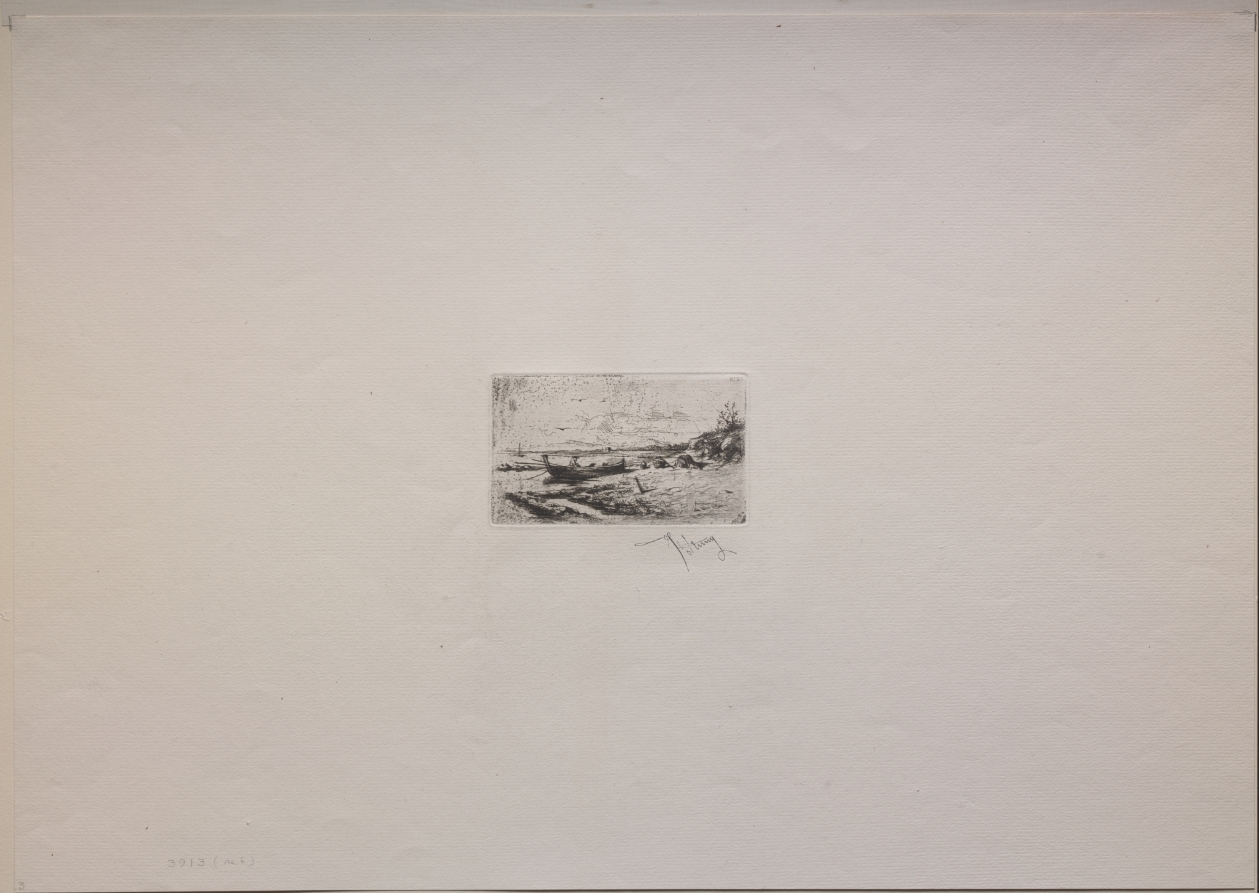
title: Untitled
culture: Spain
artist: Mariano Fortuny (Spanish, 1838–1874)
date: c. 1860–70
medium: etching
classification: Print